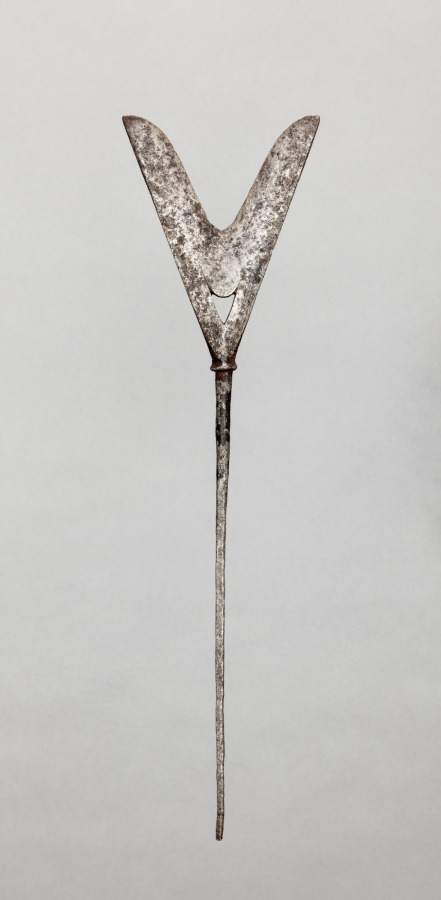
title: Arrow Head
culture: Japan, Edo period (1615–1868)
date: 1600s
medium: iron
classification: Arms and Armor